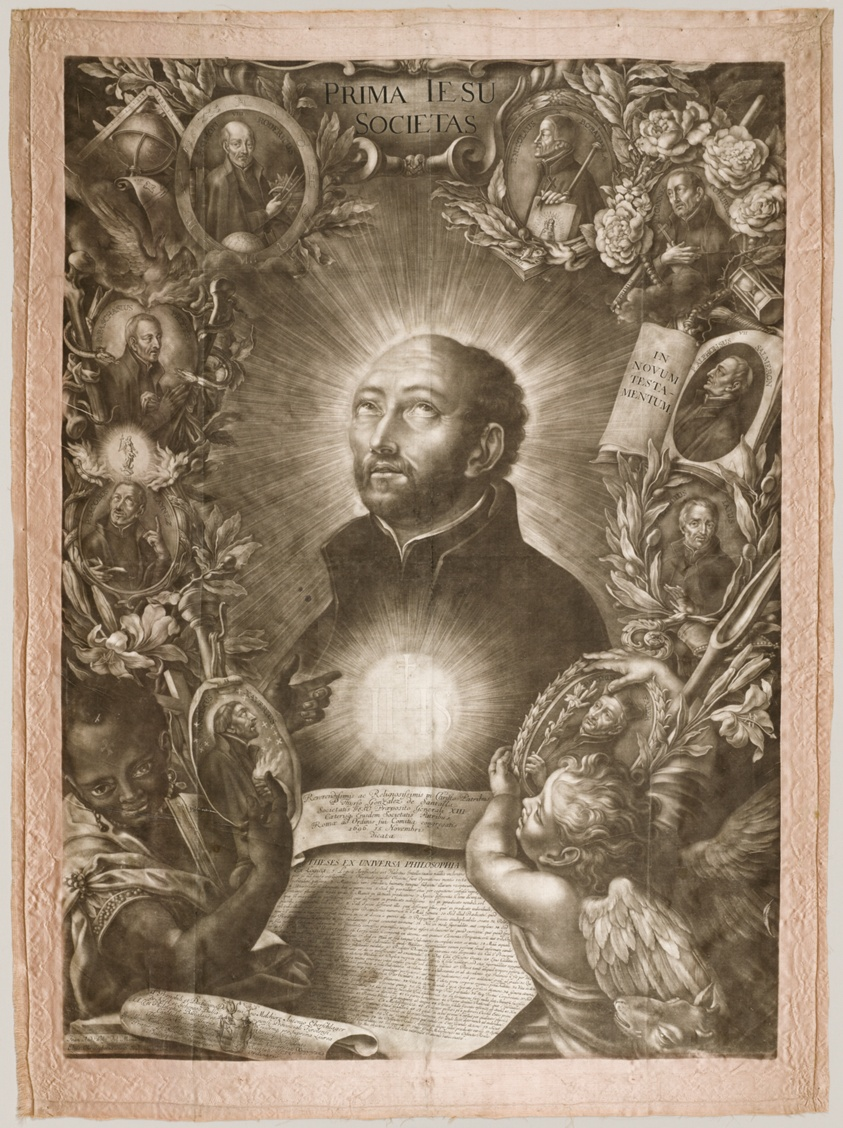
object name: Print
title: Thesis-Sheet showing Saint Ignatius of Loyola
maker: Christoph Elias Heiss (German, 1660-1731); after Johann Andreas Wolf (German, 1652-1715)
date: November 15, 1696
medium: Mezzotint, with burnishing and engraving, in black on pale pink satin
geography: Germany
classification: mezzotint; print; prints and drawing